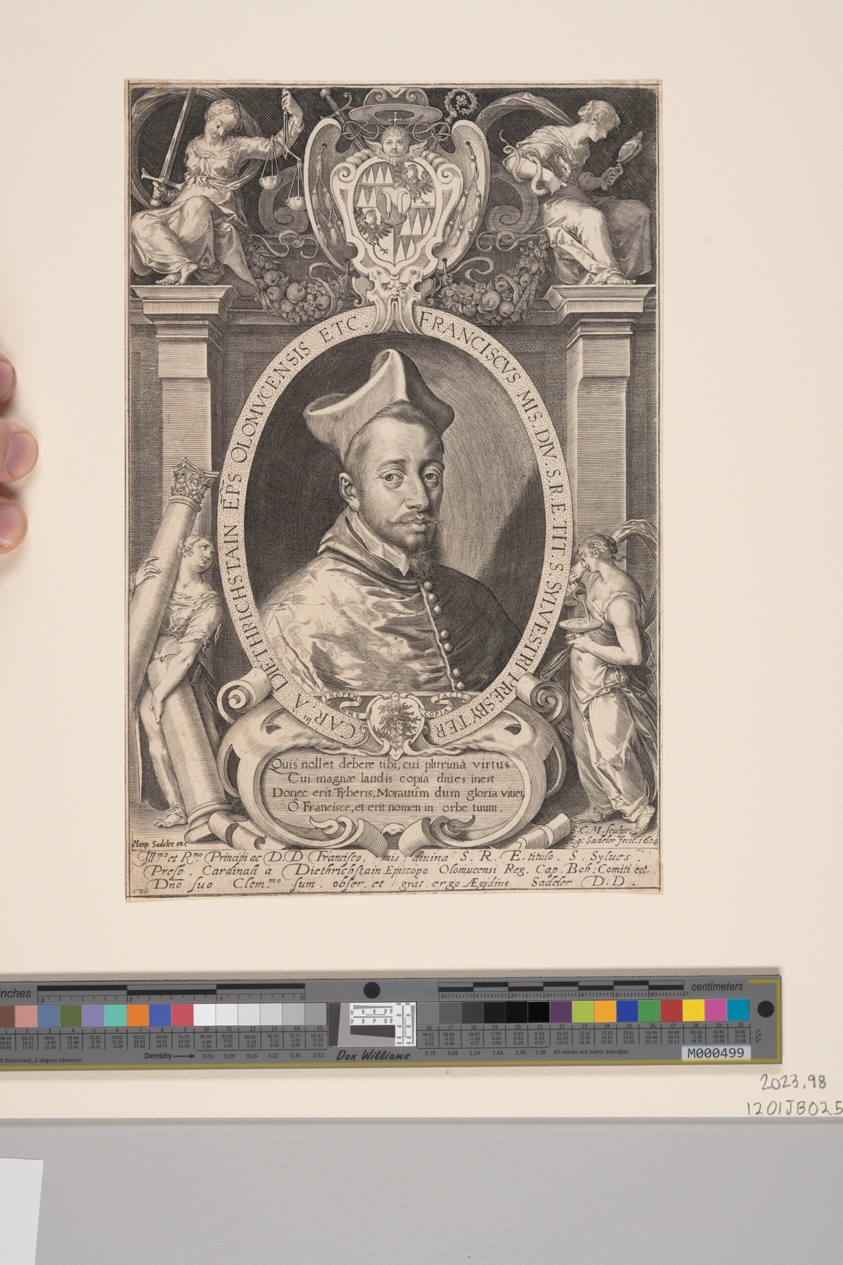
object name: Print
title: Franz von Dietrichstein, Bishop of Olmütz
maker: Aegidius Sadeler II; Flemish, c. 1570–1629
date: 1604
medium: Engraving on paper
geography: Flanders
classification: engraving; paper; print; prints and drawing